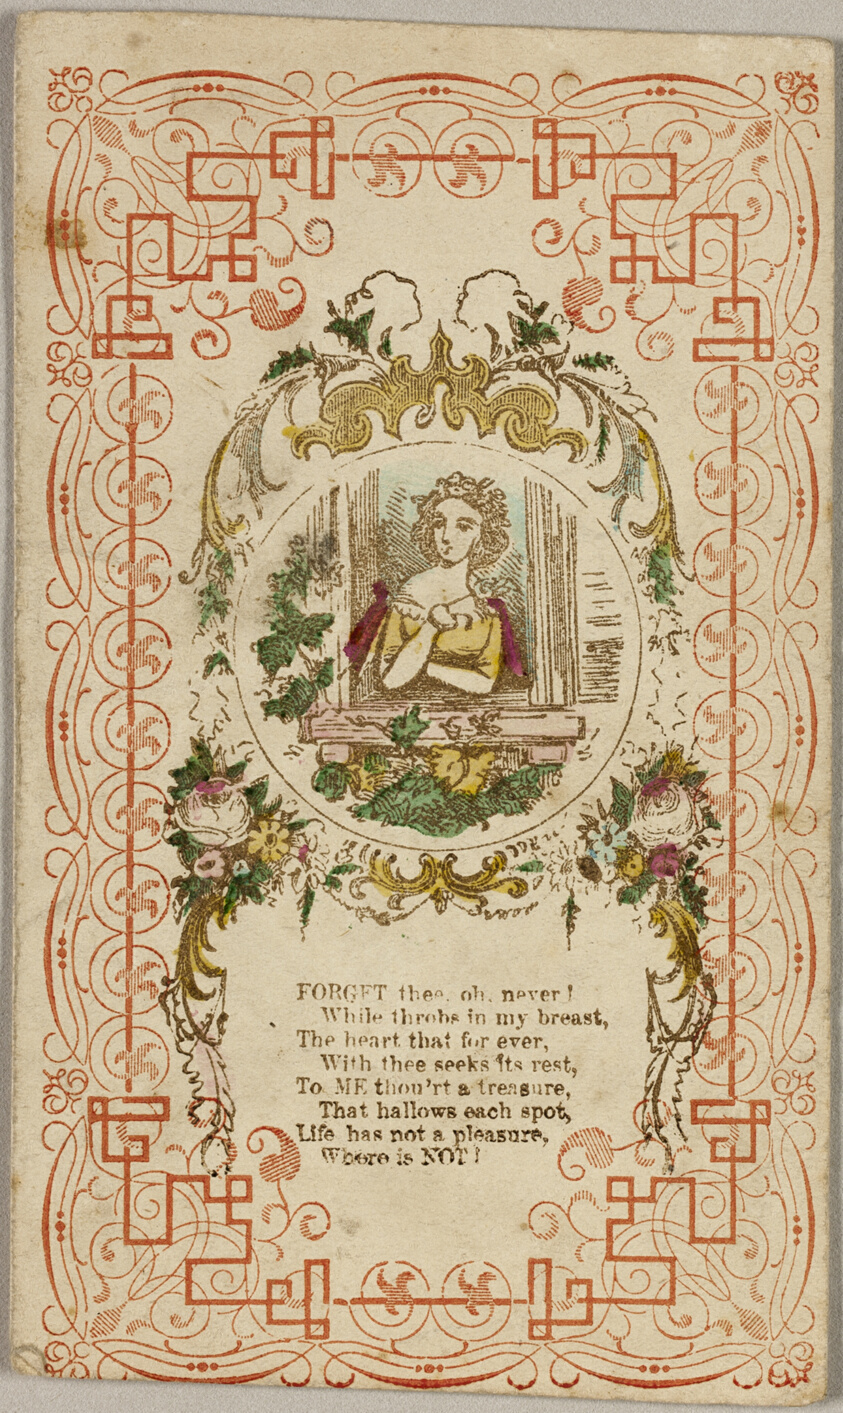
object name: Print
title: Forget thee, oh. Never! (valentine)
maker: Unknown Artist; American or English, 19th century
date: 1835/40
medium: Lithograph with hand-coloring on cream wove paper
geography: United States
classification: collage; valentine; prints and drawing; print